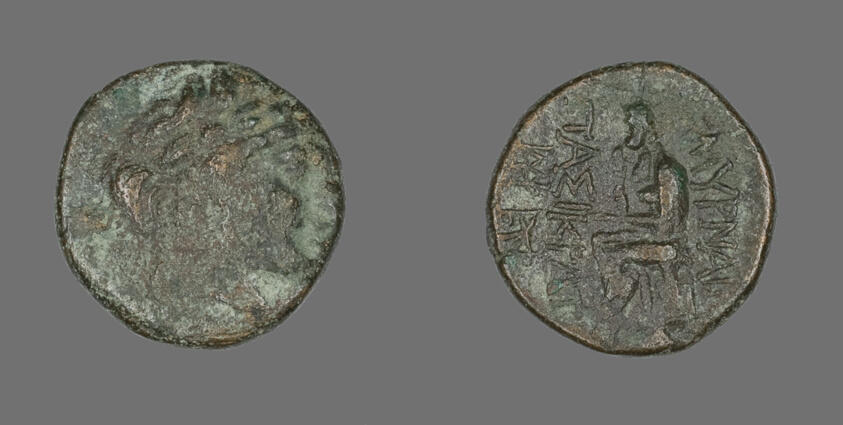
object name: Coin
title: Coin Depicting the God Apollo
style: greek, ancient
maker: Greek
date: 2nd-1st century BCE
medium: Bronze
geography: Ancient Greece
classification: coin; ancient art